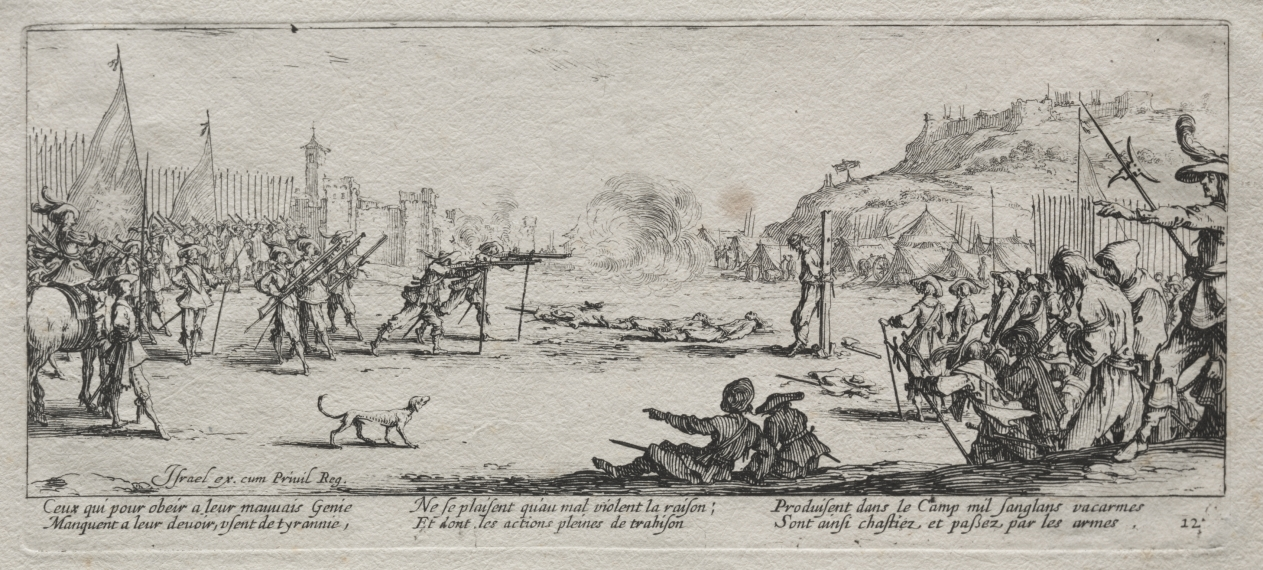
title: The Large Miseries of War: The Firing Squad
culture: France, 17th century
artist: Jacques Callot (French, 1592–1635)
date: 1633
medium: etching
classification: Print